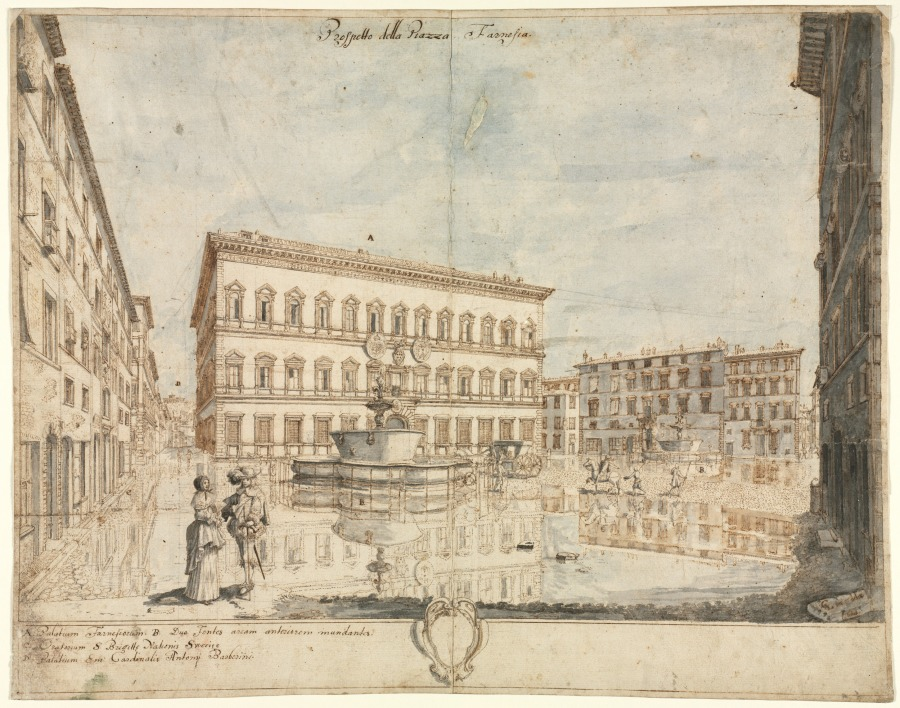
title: Eighteen Views of Rome: The Piazza Farnese (recto); Cartouche (verso)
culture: Flanders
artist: Lievin Cruyl (Flemish, c. 1640-c. 1720)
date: 1664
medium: pen and brown ink and brush and gray and blue wash over graphite; squared in graphite (two figures in the foreground); framing lines in brown ink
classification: Drawing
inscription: recto: signed, lower right, in brown ink: [artist's monogram: LC] inv. et delin. / 1664. ; by artist, upper center, in brown ink: Prospetto della Piazza Farnesia. ; by artist, througout composition, in brown ink: [the letters A-D] ; by artist, lower left, in brown ink: A. Palatium Farnesiorum. B. Duo Fontes aream anteriorem mundantes. / C. Oratorium S. Brigitte Nationis Sweciæ / D. Palatium Em: Cardinalis Antonij Barberini. verso: ON STRIPS OF PAPER MOUNTED TO PERIMETER, lower center, in graphite: A20971 ; lower right, in graphite: E. 1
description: Flemish artist Lieven Cruyl made a number of drawings of emblematic vistas of Rome for the Roman publisher Giovanni Battista de Rossi, of which ten were published as etchings in 1666. The Piazza Farnese features architecture designed by Michelangelo, who completed the Palazzo Farnese after the death of its original designer, Antonio da Sangallo, in 1546. His main contribution was the third story and the significantly protruding cornice at the top of the facade, which dramatically hangs over the front of the building, like sculpture.